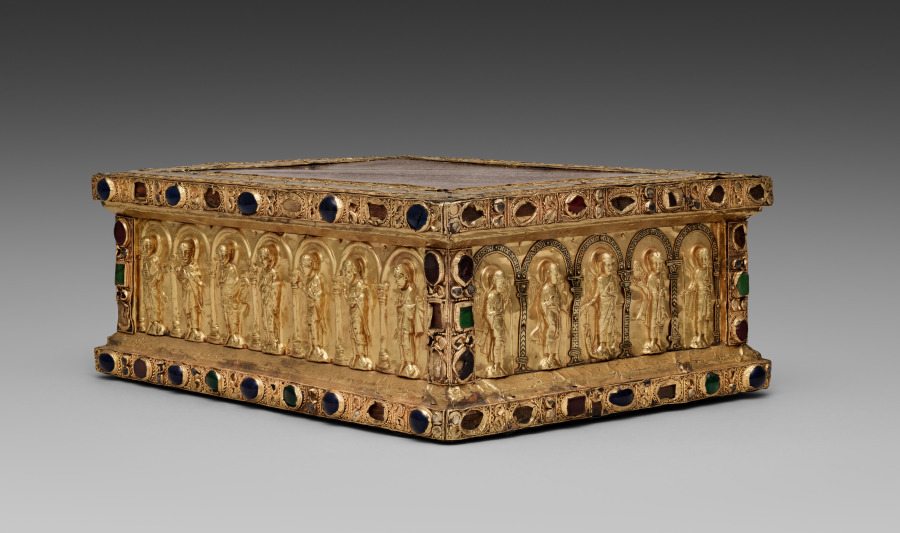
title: Portable Altar of Countess Gertrude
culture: Germany, Lower Saxony?, Romanesque period, 11th century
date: c. 1045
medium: gold, cloisonné enamel, porphyry, gems, pearls, niello, wood core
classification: Metalwork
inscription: GERDRVDIS XPO FELIX VT | VIVAT IN IPSO OBTVLIT HVNC LAPIDEM GEMMIS | AVROQ NITENTEM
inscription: SIGISMVNDVS, CONSTANTIVS, SANCTA CRVX, SCA ELENA, SCA ADALHEIT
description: Commissioned by Countess Gertrude of Brunswick, this portable altar is one of the Guelph Treasure’s earliest and most sumptuous objects. The choice of white-speckled porphyry as the altar stone signals Gertrude’s worldly aspirations; an imperial color since classical antiquity, porphyry was only used by the imperial family. Historical figures of royal and imperial rank are depicted with Christ, the Virgin, apostles, and archangels along the altar’s sides, stressing the countess’s political ambitions and claim of imperial lineage for her own dynasty. The Latin inscription surrounding the altar stone reads, "Gertrude offers to Christ, to live joyfully in him, this stone that glistens with gems and gold."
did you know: On the bottom of this altar is a trap door that opened to reveal small relics of saints wrapped in silk.